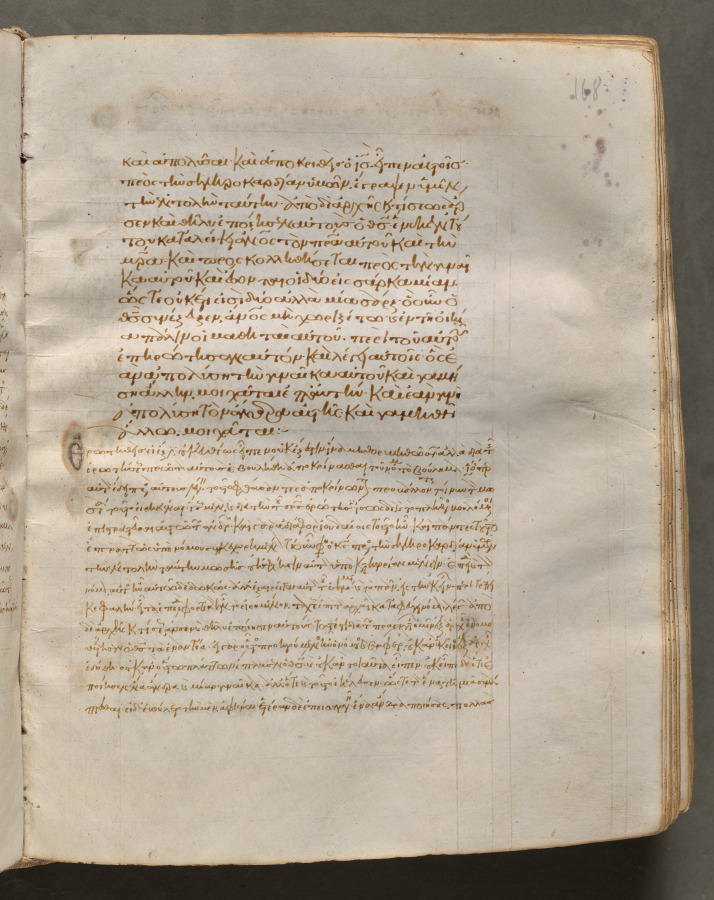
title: Text, folio 168 (recto), from a Gospel Book with Commentaries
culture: Byzantium, Constantinople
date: c. 1000–1100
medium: ink, tempera, and gold on vellum; leather binding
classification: Bound Volume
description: Each of the four gospels in this book opens on a page with brilliantly illuminated borders depicting the author of the text as well as birds-principally peacocks, symbols of the immortality of the soul-and fountains, representing the fountain of life and the salvation of the soul. This volume consists of 428 leaves with texts in Greek. Its level of sophistication suggests that it was probably written and decorated in a monastery in Constantinople.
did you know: Gospel Books were carried in procession through Byzantine churches.